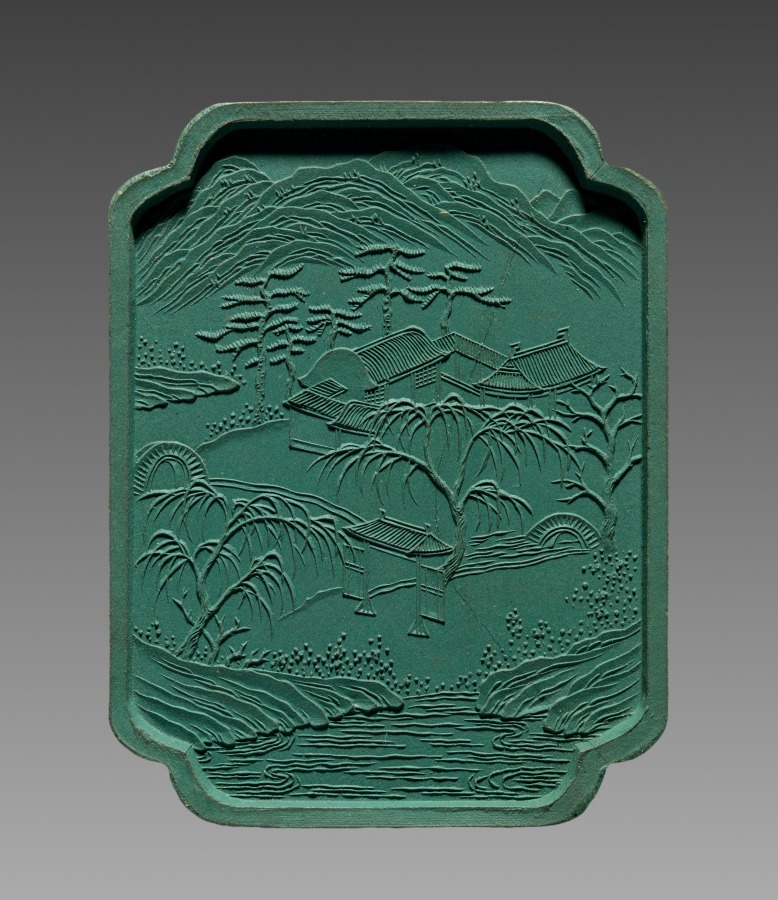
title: Ink Stick from an Imperially Commissioned Set of Ink Stick with Images and Poems of Famous West Lake Sites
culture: China, Qing dynasty (1644–1911), Qianlong reign (1736–95)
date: 1780–94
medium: Molded ink in green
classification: Miscellaneous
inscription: 乾隆年製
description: This is one of ten ink cakes of different shapes and colors stored in an exquisite lacquer box. Each is inscribed in gold with a poem by the Qianlong emperor, praising the ten famous sights of the Westlake in Hangzhou, near Shanghai. The Westlake is famous for its natural beauty; it was a favorite imperial destination and remains a tourist attraction today. Ink cakes (also called ink sticks) are dissolved with the addition of water and ground on the surface of a flat stone into liquid ink for painting and calligraphy. The precious ink cakes here, however, have never been used.